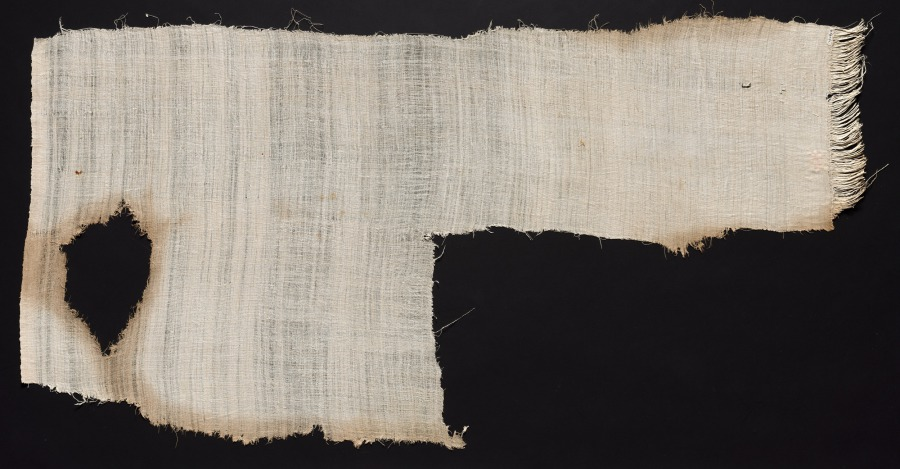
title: Mummy Linen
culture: Egypt, New Kingdom (1540–1069 BCE), Dynasty 18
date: 1540–1296 BCE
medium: plain weave: linen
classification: Textile